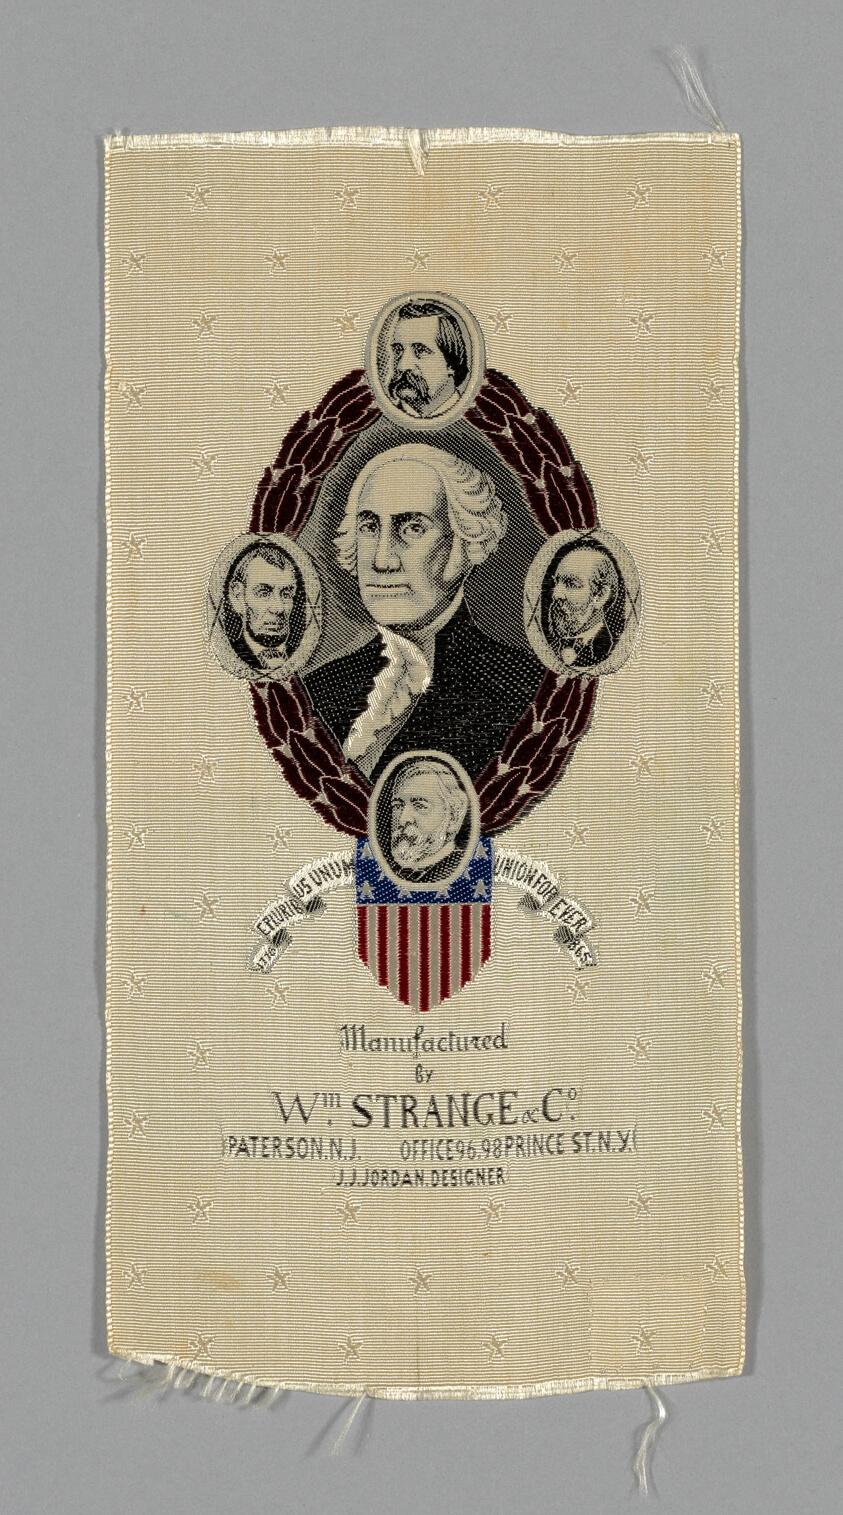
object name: Textile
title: Commemorative Ribbon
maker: Manufactured by William Strange & Company; United States, New Jersey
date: c. 1885/90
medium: Silk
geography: United States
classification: textile; weaving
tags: propaganda